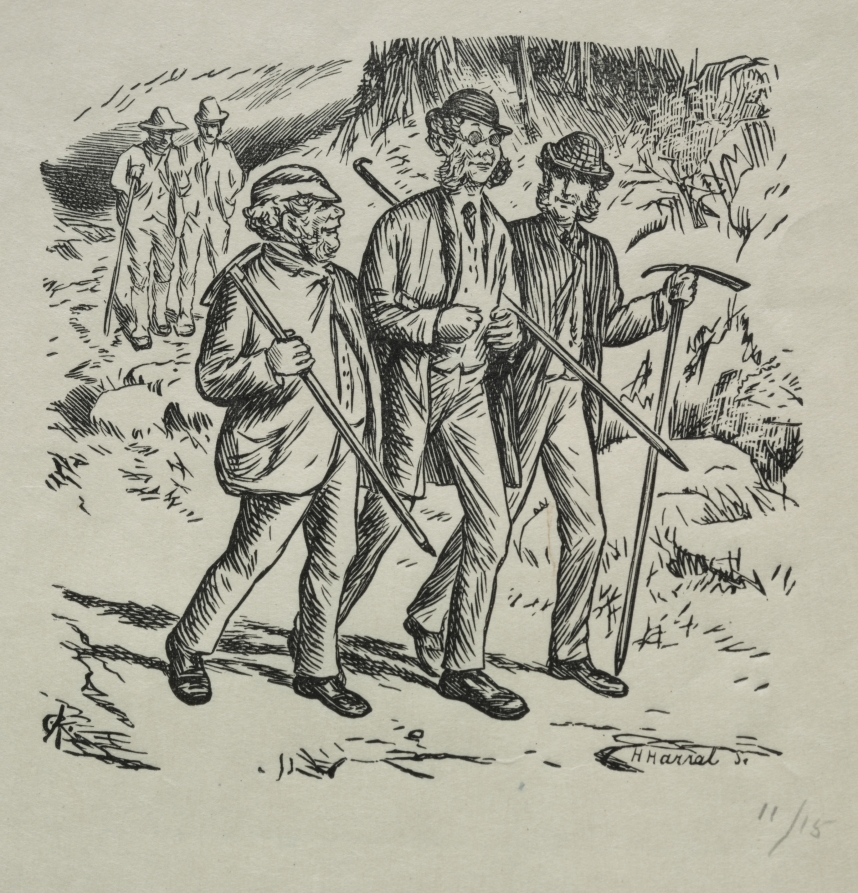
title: The Three Names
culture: England, 19th century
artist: Charles Samuel Keene (British, 1823–1891)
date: 1869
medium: wood engraving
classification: Print